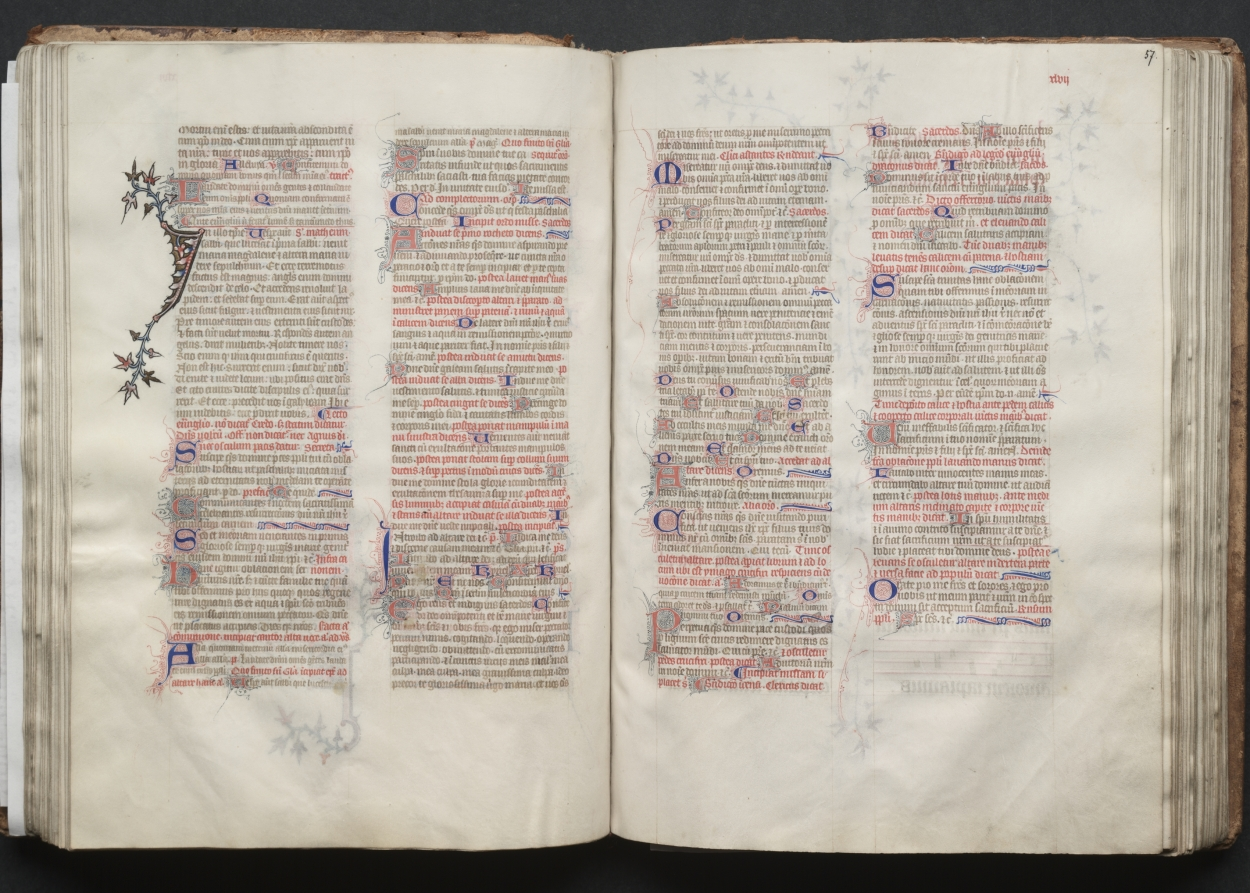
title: The Gotha Missal: Fol. 56v, Text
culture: France, Paris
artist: Master of the Boqueteaux (French)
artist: and Workshop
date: c. 1375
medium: ink, tempera, and gold on vellum; blind-tooled leather binding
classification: Bound Volume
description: The style and quality of this manuscript's decoration is typical of deluxe Parisian books made for aristocratic or royal patrons. Most of the book's decoration appears to be the work of the Master of the Boqueteaux, an artist active at the court of King Charles V (died 1380). His style was apparently shared by a number of book illuminators working in and around Paris. It is very possible that the Gotha Missal belonged to Charles V, but is not provable because the manuscript has no royal portraits and lacks a colophon. Given the book's magnificent decoration, however, it would seem that it was produced for a Valois prince, if not for the king himself. The manuscript receives its name from the German dukes of Gotha, its later owners.